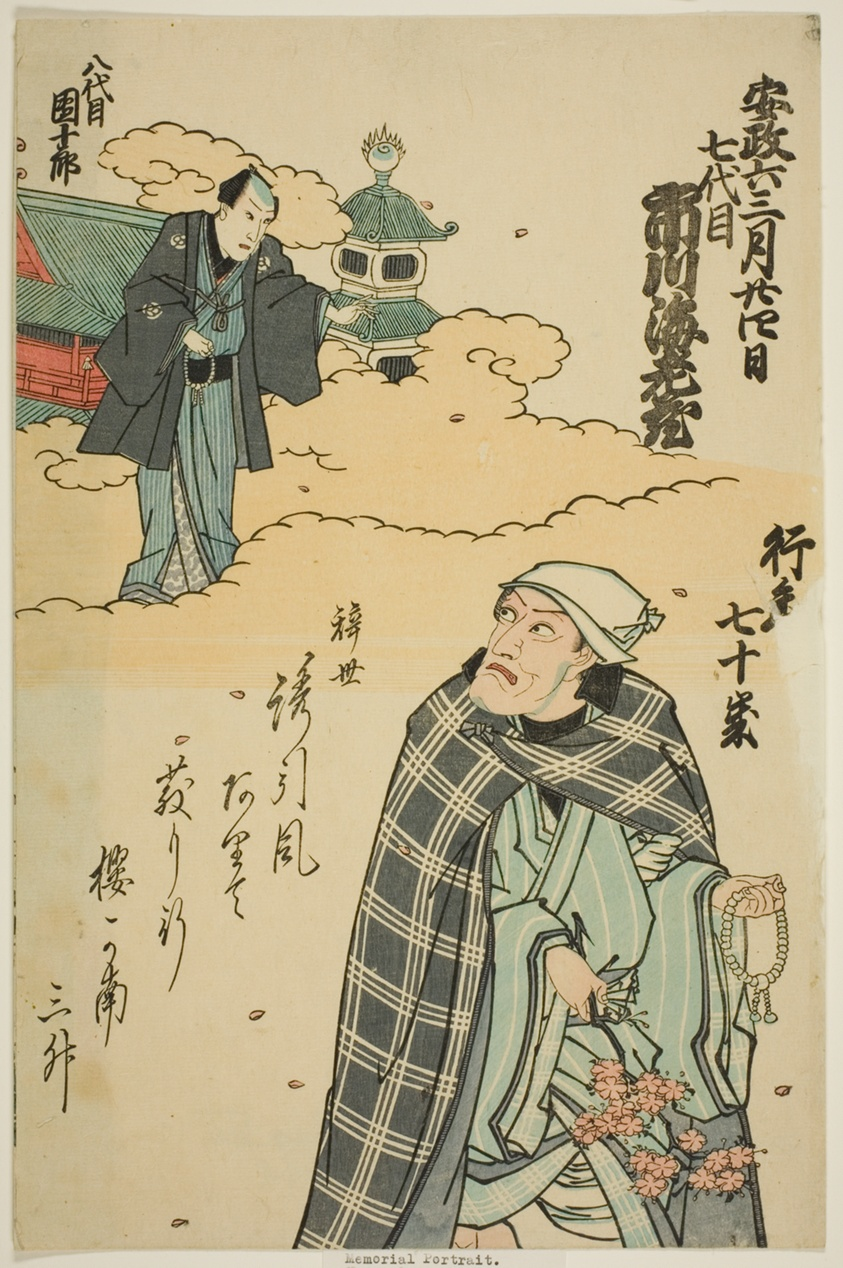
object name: Print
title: Memorial Portrait of the Actor Ichikawa Ebizo V (Danjuro VII)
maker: Utagawa School (Japanese, 19th century)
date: 1859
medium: Color woodblock print; oban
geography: Japan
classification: print; asian art